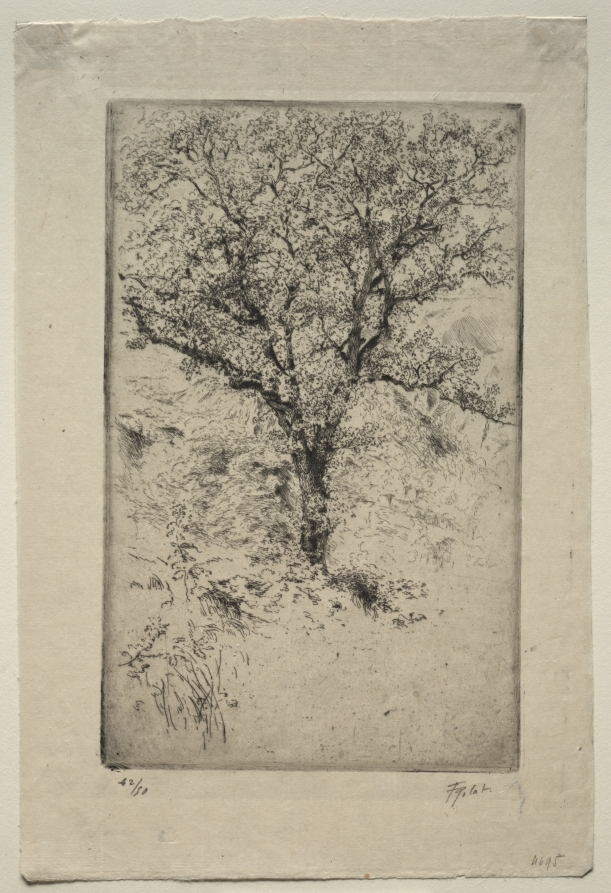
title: The Great Oak Tree, Monte Oliveto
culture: France, 20th century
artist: Tigrane Polat (French, 1874-)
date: 1900?–1925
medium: etching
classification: Print